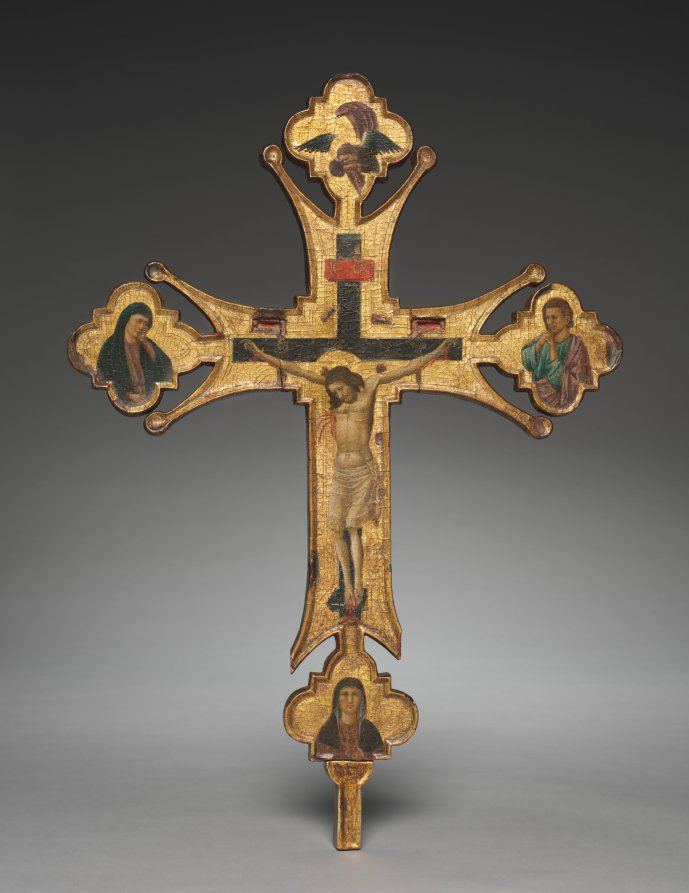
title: Processional Cross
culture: Italy, Umbria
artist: Master of Santa Chiara (Italian)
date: c. 1320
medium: oil on canvas on wood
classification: Painting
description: This cross was originally mounted on a tall pole and carried in religious processions. Therefore, the figures on each side are almost identical. In the center is Christ crucified. Looking on from the elaborate terminals at left and right are the Virgin and Saint John. The bottom terminal shows a different saint on each side: Saint Francis on one and Saint Clare on the other. At the top of each side is an angel. Although one angel looks up and the other down, both express intense grief in their faces and gestures. The Master of Santa Chiara is the name given to this unknown artist who painted this and several other works in Assisi. In that city, Saint Francis founded an order of friars while Saint Clare established a counterpart for women called the Poor Clares. The presence of both saints on this cross suggests that it was made for one of Assisi's Franciscian institutions.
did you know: This cross is painted on both sides so that while being carried in a procession the images are visible to a crowd; both sides are not quite identical.